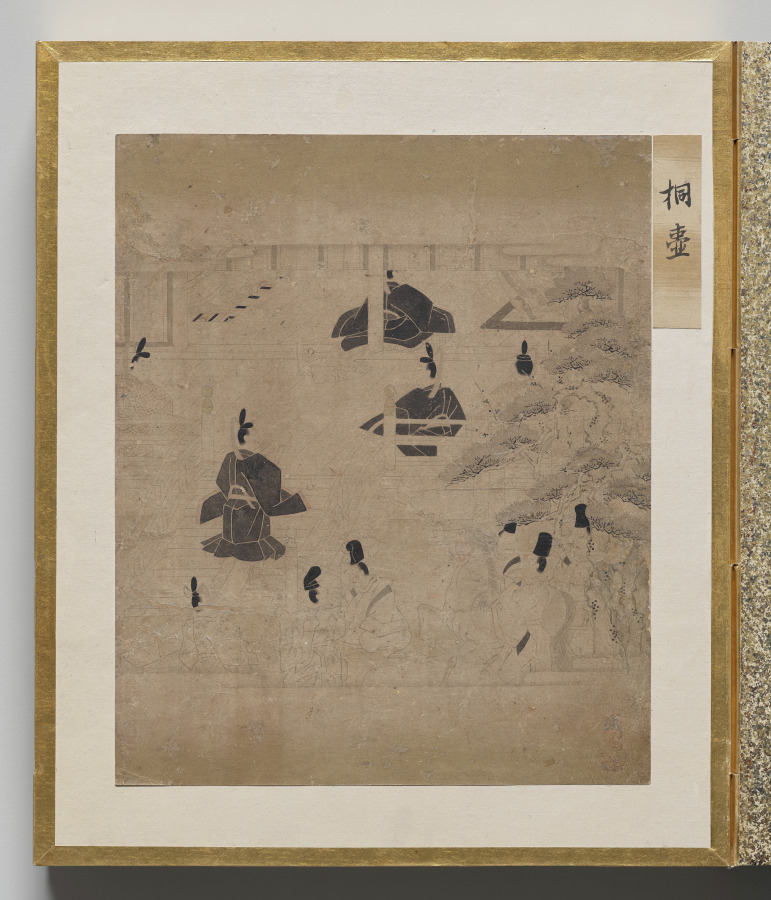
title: Paulownia Court from Album of Illustrations for the Tale of Genji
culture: Japan, Edo period (1615–1868)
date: 1600s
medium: painting in an accordion-style album; ink, light color, and gold on paper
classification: Bound Volume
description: This album contains illustrations for the classic literary work the Tale of Genji, authored in the 1000s by Murasaki Shikibu, an aristocrat of the Heian period (794–1185) court. The scenes are painted in the “white drawing” (hakubyō) mode, in which a fine ink line is used to depict figures and spaces with great subtlety, punctuated only occasionally by traces of red pigment for a character’s lips, a detail of a garment, or a decorative element. These two scenes illustrate episodes from the chapters “Thin Veil of Cloud” (Usugumo) and “Barrier Gate” (Sekiya).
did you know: The illustrations are identified by chapter title in cartouches to the upper right of the paintings.